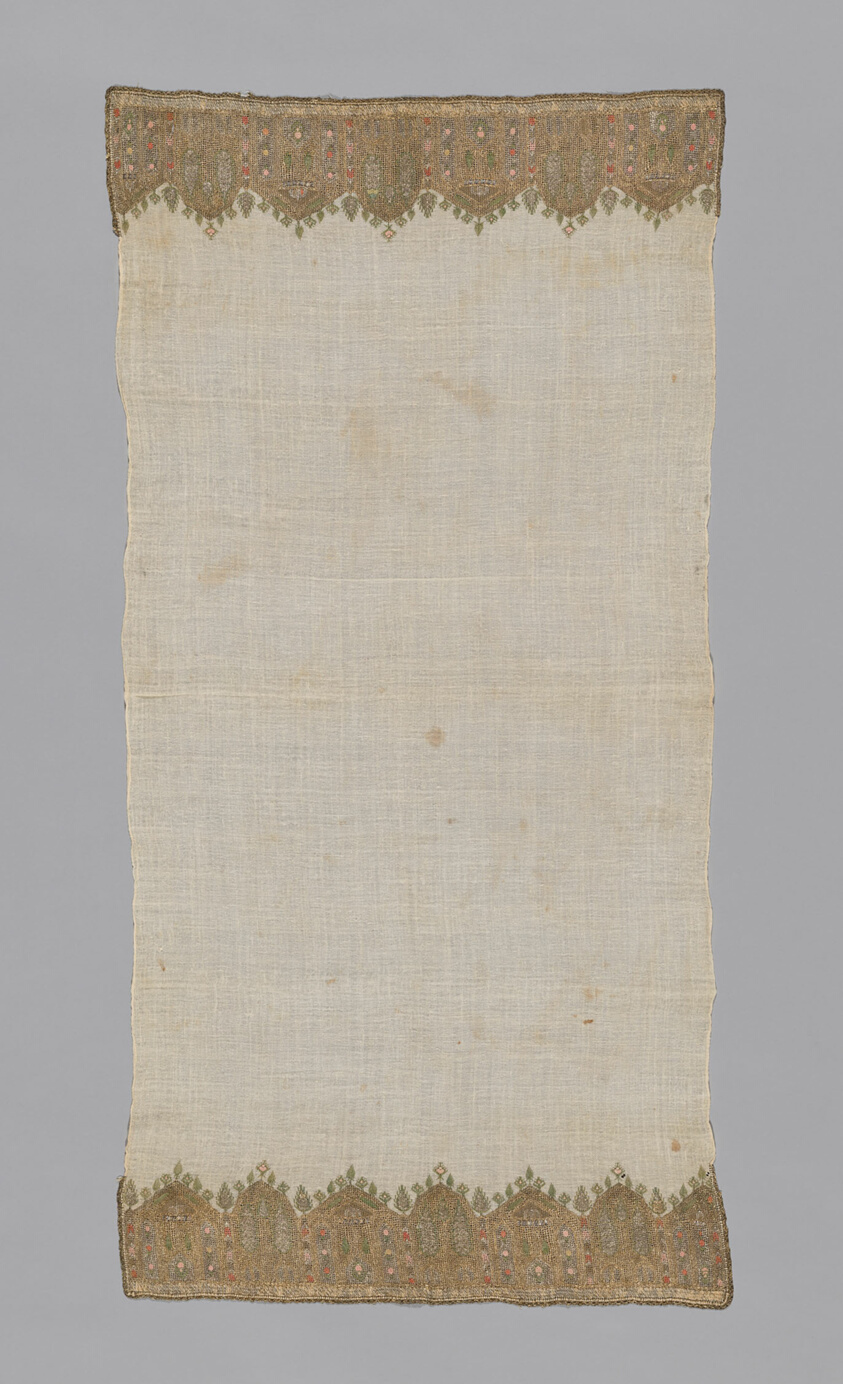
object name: Textile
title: Towel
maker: Turkey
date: 18th century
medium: Towel in drawn work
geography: Turkey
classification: textile; needlework (visual works); weaving